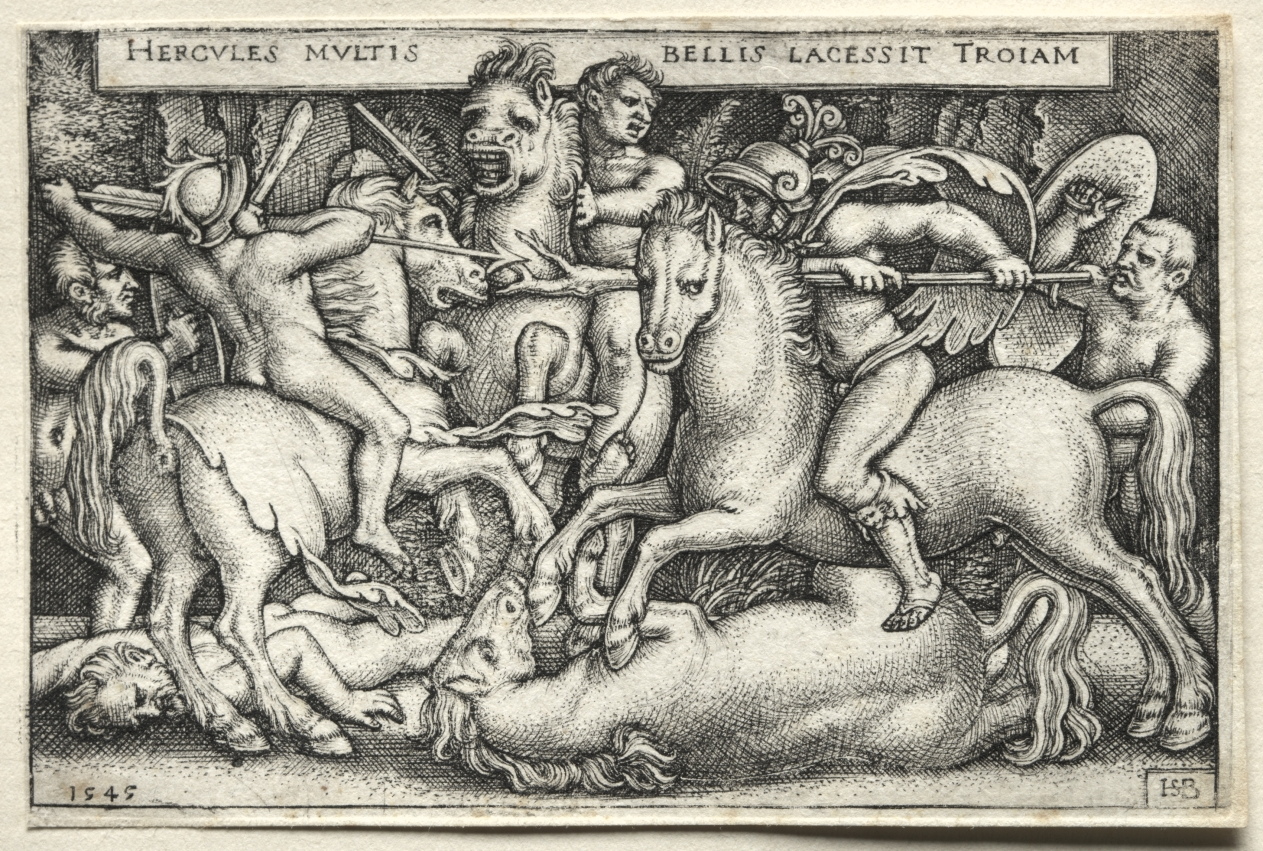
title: The Labors of Hercules: Hercules Conquering Troy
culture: Germany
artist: Hans Sebald Beham (German, 1500–1550)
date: 1545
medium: engraving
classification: Print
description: According to legend, before the Trojan War, Hercules traveled to Troy and pillaged it. In this battle scene packed with soldiers and war horses, Hercules can be identified by the lion-skin cape billowing behind him. He uses a lance made from a small tree, torn out by the roots, while his steed tosses a piercing glance directly at the viewer. Beham was one of several German printmakers referred to today as the “Little Masters.” They established their artistic prowess by engraving remarkably small prints, appealing to collectors fascinated with miniature objects and curiosities.